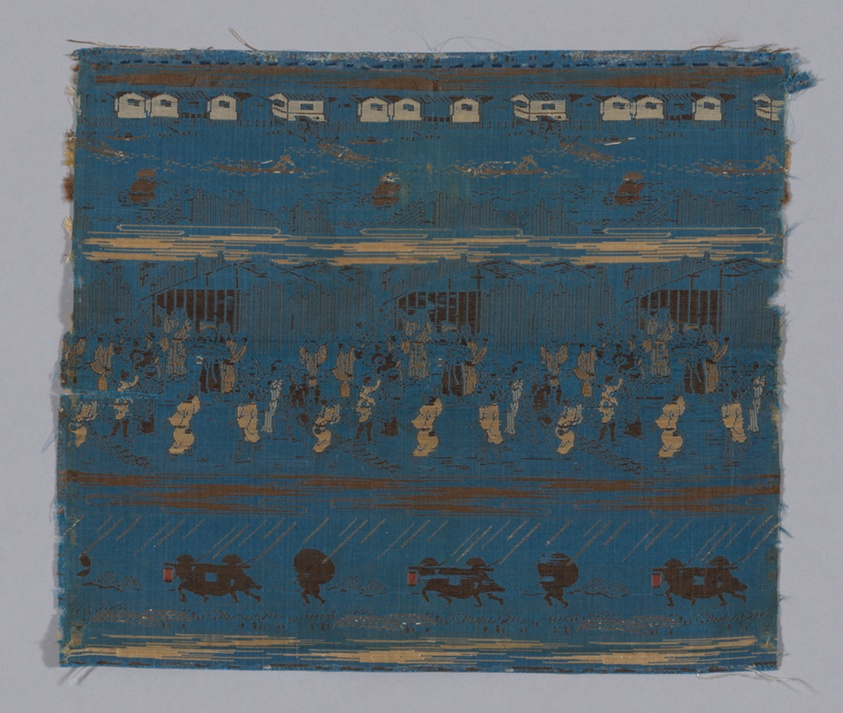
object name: Textile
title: Fragment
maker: Japan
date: late Edo period (1789–1868)/ Meiji period (1868–1912), 19th century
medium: Single plain compound cloth, silk & silvered paper; 3 strips to m.m.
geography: Japan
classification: textile; weaving